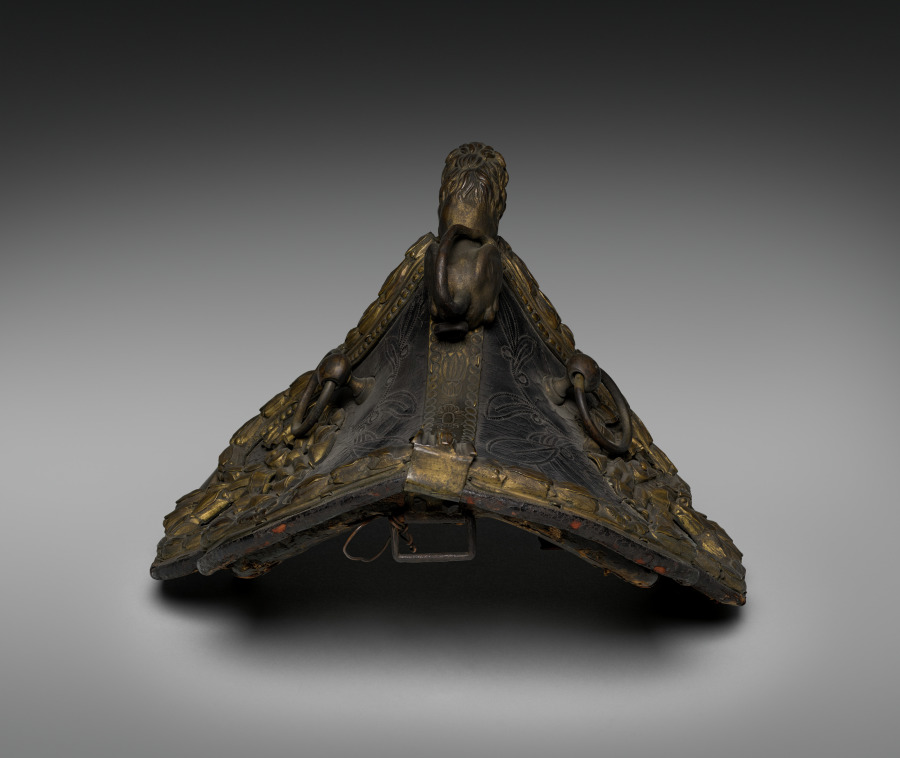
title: Child's Harness Saddle with Lion Pommel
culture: France, 17th century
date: 1600s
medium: leather, tooled with wood, canvas and steel on a brass frame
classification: Arms and Armor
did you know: This child-sized harness saddle was said to have been used in a riding school.